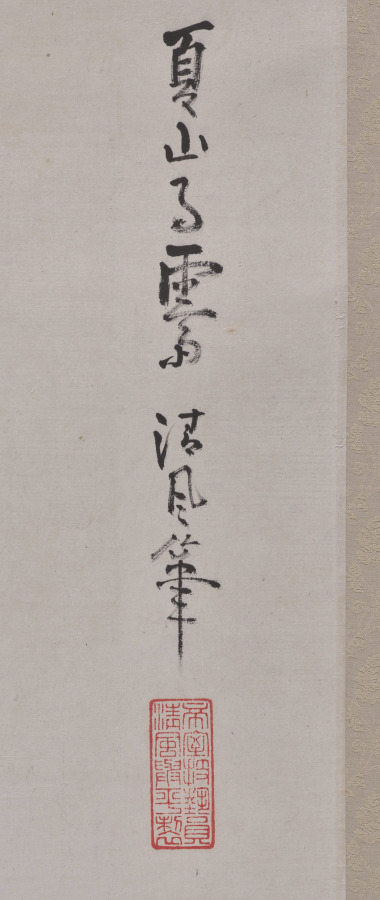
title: Rain Clearing over a Summer’s Mountain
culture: Japan, Meiji period (1868–1912)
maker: Seifū Yohei III (Japanese, 1851–1914)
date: 1893–1914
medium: hanging scroll; ink on paper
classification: Painting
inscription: The signed inscription by the artist in the painting’s upper right gives the title "Rain Clearing Over a Summer’s Mountain" and is accompanied by his Imperial Household Artist seal.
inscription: Artist's signature seal in the lower left on the grassy riverbank.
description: Before entering into his apprenticeship with Yohei II, Yohei III trained as a painter in Osaka. He continued to paint throughout his career as a ceramist. Yohei IV authenticated this painting as having been done by his father in a box lid inscription dated to the summer of 1919 . The signed inscription by Yohei III in the painting’s upper right gives the title Rain Clearing Over a Summer’s Mountain and is accompanied by his Imperial Household Artist seal. His signature seal is found in the lower left on the grassy riverbank. The composition follows a basic literati painting convention: it is divided into a foreground, middle ground, and background, with trees in the front, a temple in the middle, and mountains at the back. The brushwork, too, with its ovals of inkwash and dry-brushed dots and lines, has the casual feel of a painting made for one’s own amusement or dashed off for a friend. As part of his ceramic practice, Yohei III also made roller ends to be placed at either end of the wooden dowel around which the lower part of a hanging scroll mounting is wrapped. These served both as weights for the painting and as knobs for handling it when rolling and unrolling. The pair here, CMA 2022.152, is made of porcelain with a green glaze.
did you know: Seifū Yohei III studied to paint ink compositions in an abstracted, calligraphic way associated with well-read people who made paintings for their own amusement and as gifts for friends.